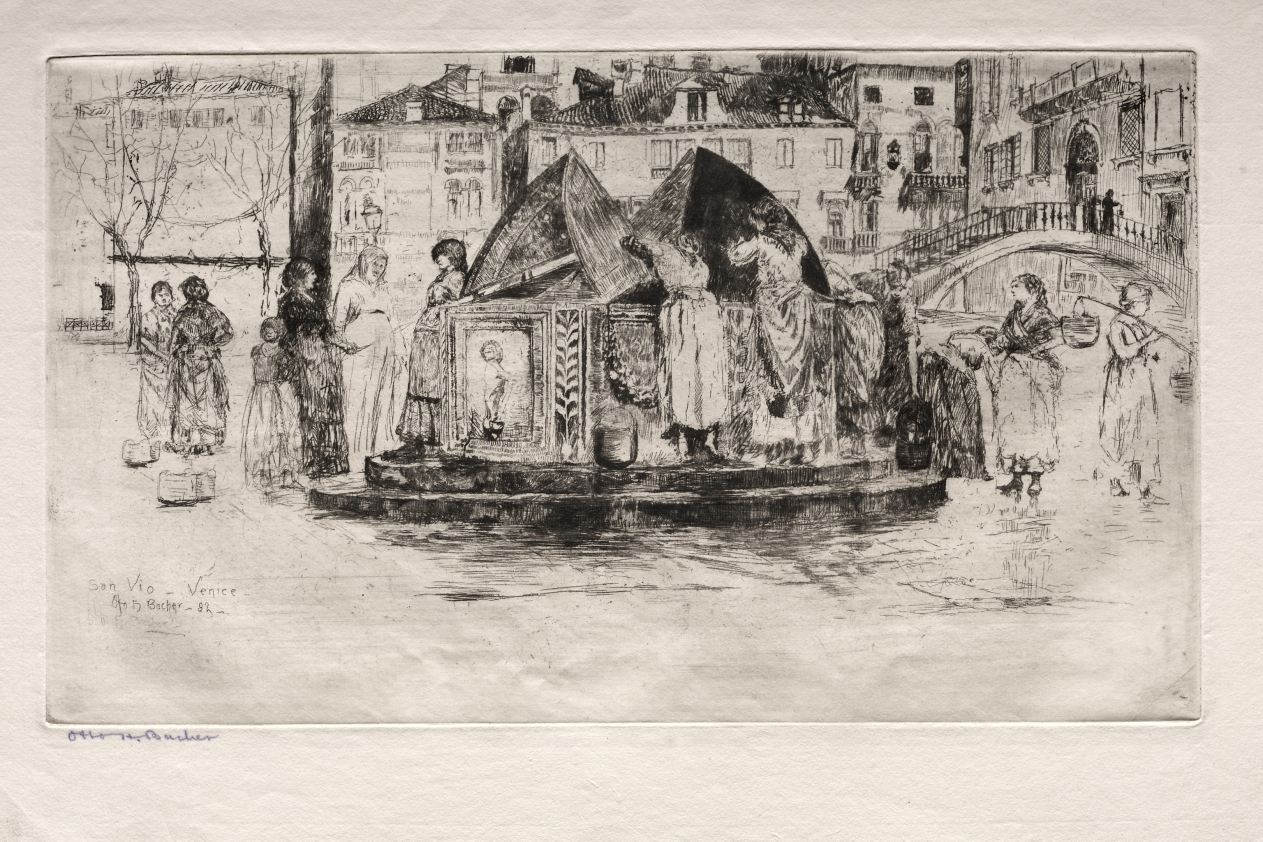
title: Etchings of Venice: Pozzo San Vio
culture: America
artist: Otto H. Bacher (American, 1856–1909)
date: 1882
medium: etching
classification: Print